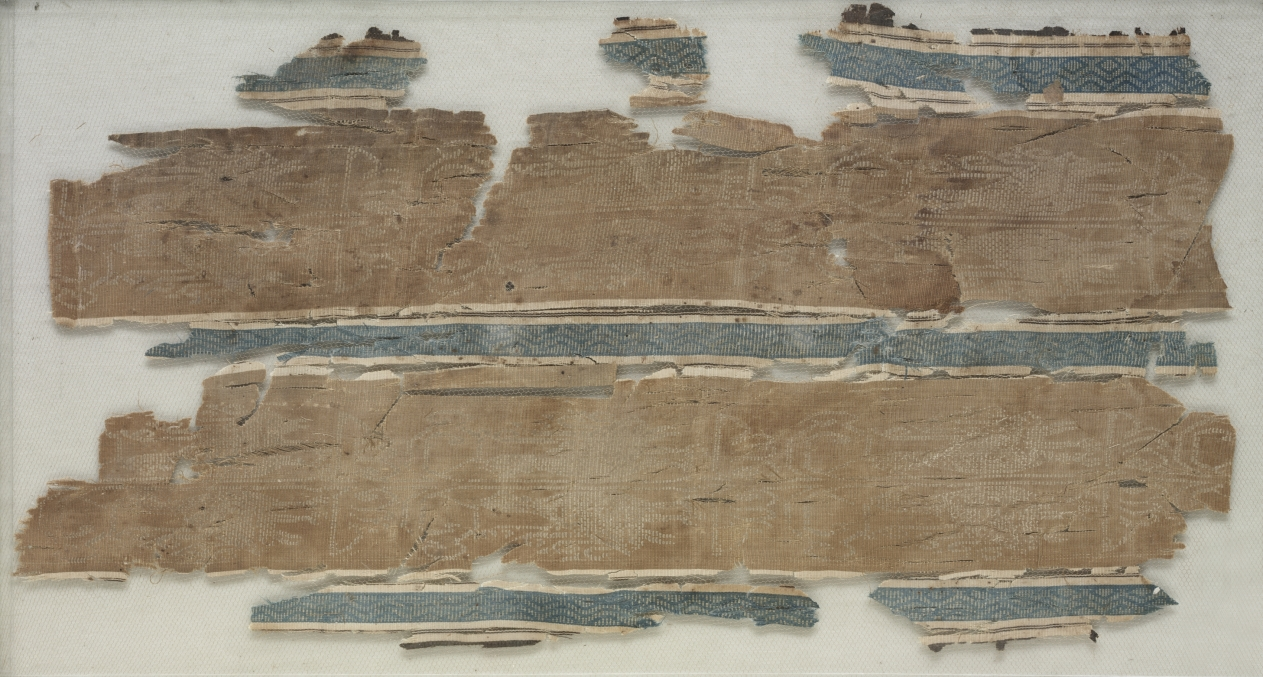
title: Silk fragment with striped pattern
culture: Syria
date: 900s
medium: plain weave variation with supplementary weft: silk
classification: Textile